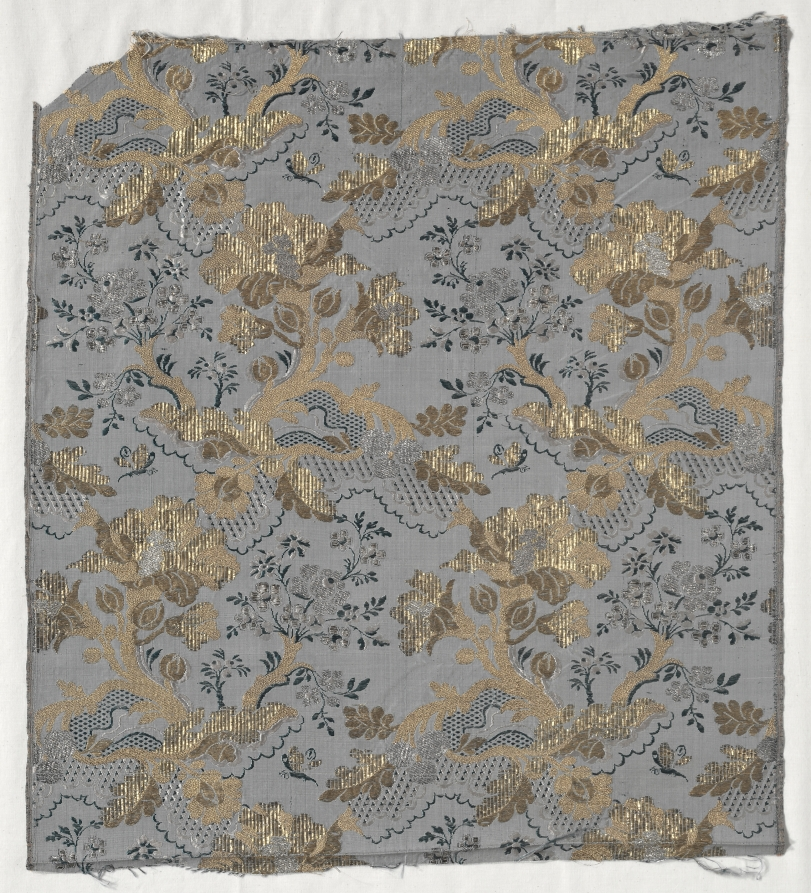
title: Length of Textile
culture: France, 18th century, Period of Louis XV (1723-1774)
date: 1723–1774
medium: plain cloth, brocaded; silk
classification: Textile